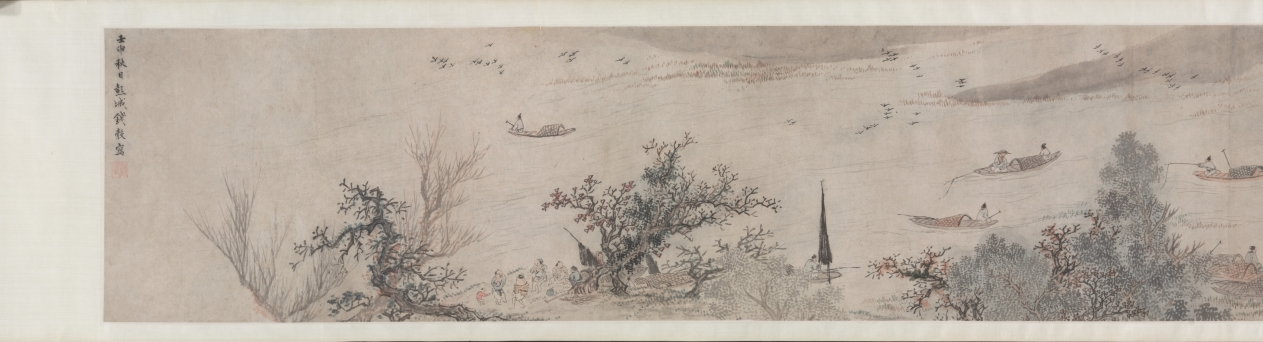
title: Fisherman's Joy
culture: China, Ming dynasty (1368–1644)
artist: Qian Gu (Chinese, 1508–c. 1578)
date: 1572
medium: Handscroll; ink and light color on paper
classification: Painting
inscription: Artist's inscription, signature, and seal: On the autumn day of the jen-shen year [1572], P'eng-ch'eng, Ch'ien Ku painted [this]. [seal] Hsüan-ch'ing shih. 2 colophons, both dated 1689, and 5 additional seals of Yün Shou-p'ing (1633-1690).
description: This painting has a scene showing two small crafts, each manned by two fishermen, practicing a traditional fishing method. In one of them, a man uses a bamboo pole to direct the movements of a cormorant bird sent into the water. Cormorant fishing, witnessed in some areas of the lower Yangzi River, appears in Zhe school paintings. Qian Gu may have borrowed these narrative figure scenes from Zhe school paintings, while his vantage point, brushwork, and soft tones align with the Wu school style. Scenes of fishermen appealed to urban and educated audiences who idealized the self-sufficient independence of fisherfolk.